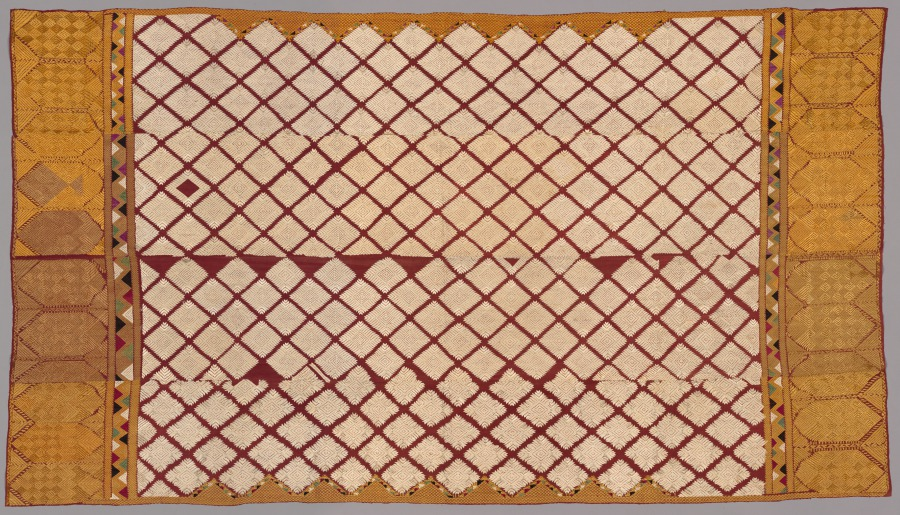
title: Head Shawl ("Phulkari")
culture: India, Punjab, 19th century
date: 1800s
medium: embroidery: silk on cotton tabby ground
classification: Embroidery